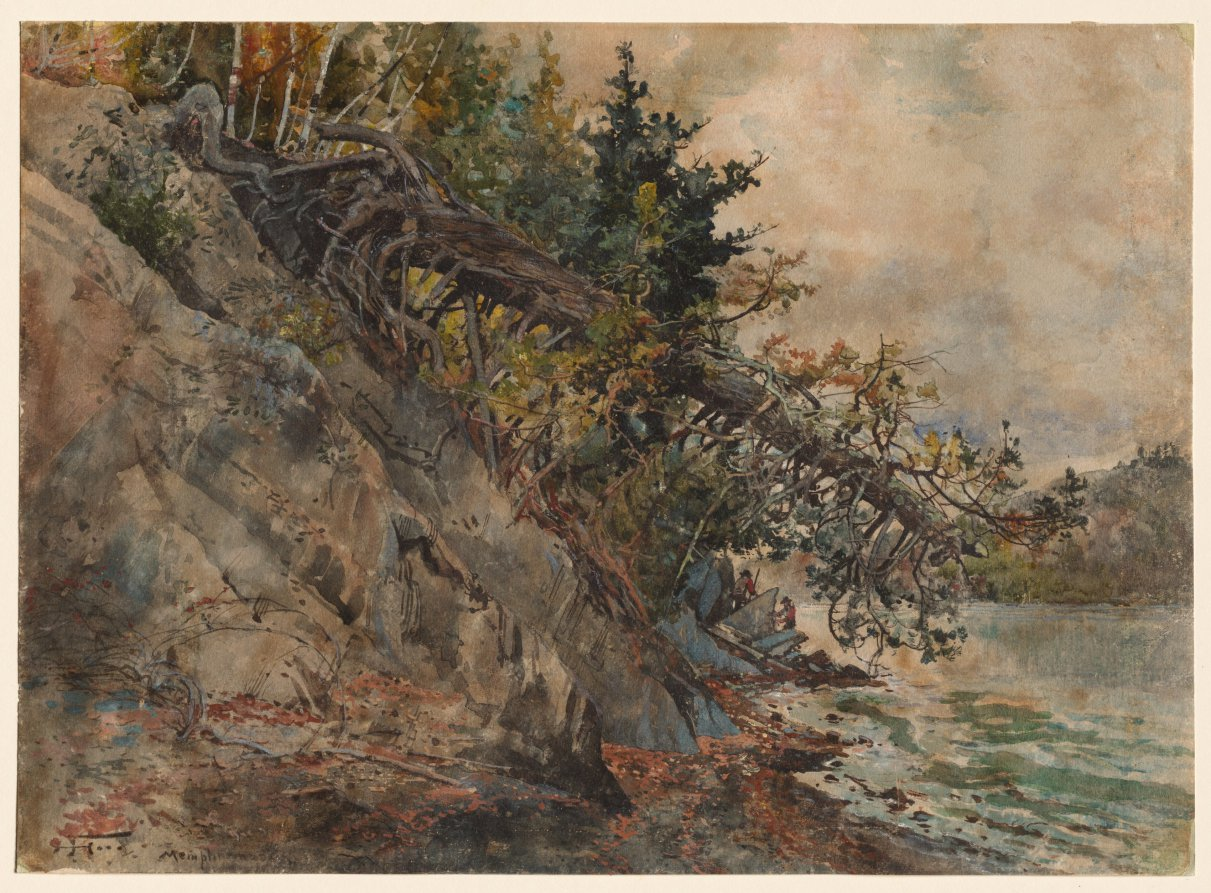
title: Lake Memphremagog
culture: America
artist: Harry Fenn (American, 1838/45–1911)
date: c. 1880s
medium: watercolor and gouache over graphite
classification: Drawing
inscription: signed, lower left, in black ink: [artist monogram] ... Memphremagog ; VERSO OF SECONDARY SUPPORT, lower left, in graphite: WCA - 3518 ; [see departmental card for record of old inscriptions]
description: This watercolor reveals the technical virtuosity of Harry Fenn, an illustrator famed for his rich handling of detail and his bizarre sense of fantasy. As a young man, Fenn sketched widely in the United States for a lavish two-volume set titled Picturesque America. After 1881, he devoted himself to watercolor painting and illustrating. This watercolor represents Lake Memphremagog, which extends across the border of America and Canada, from North Vermont into South Quebec.